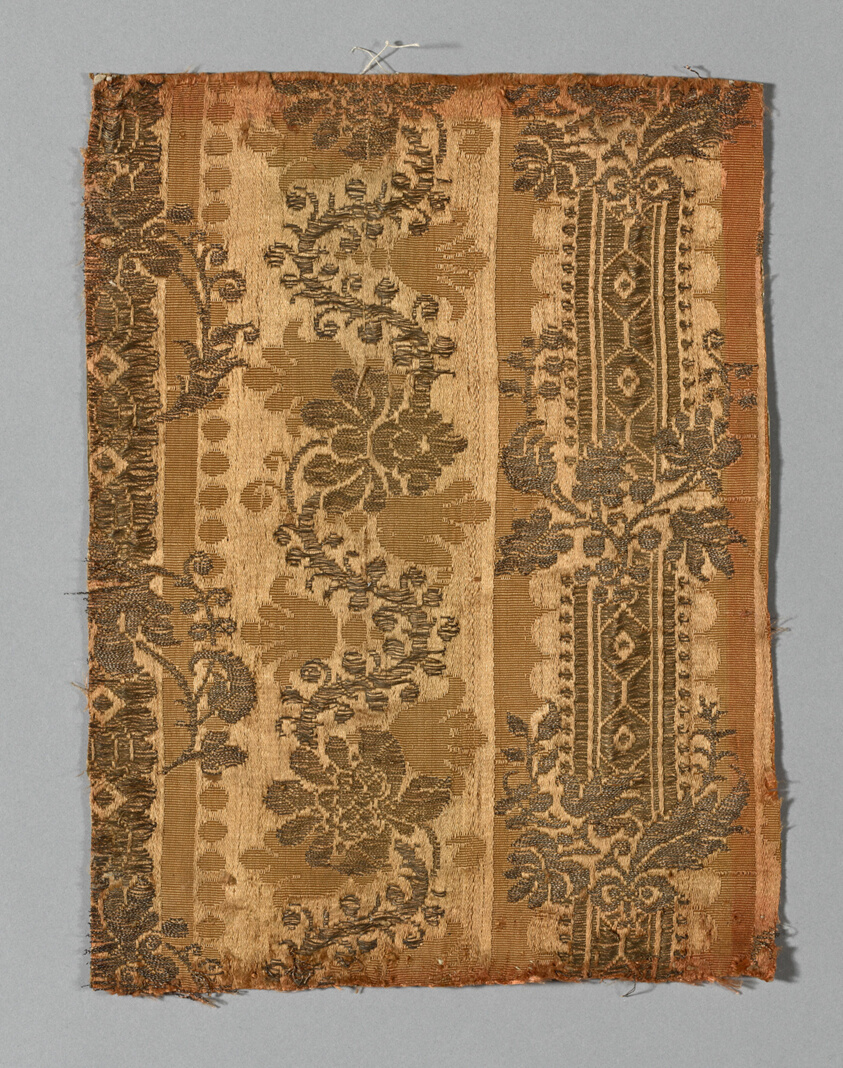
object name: Textile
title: Fragment (Dress Fabric)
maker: Italy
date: 1650/1700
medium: Brocaded fancy simple satin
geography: Italy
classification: textile; weaving